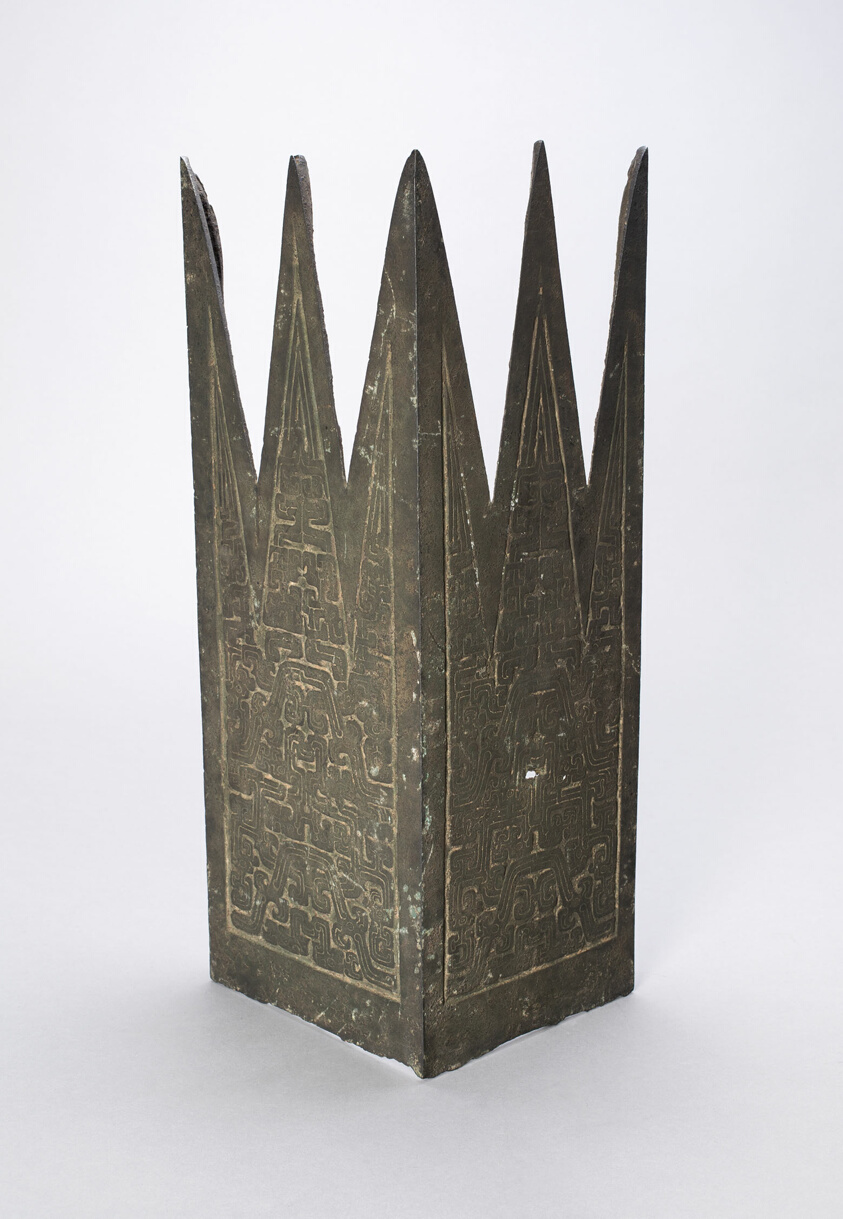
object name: Architectural fragment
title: Architectural Fitting (Gong)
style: Chinese (culture or style)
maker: China, Qishan county, Shaanxi province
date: Eastern Zhou dynasty, Spring and Autumn period (770–481 B.C.), 7th century B.C.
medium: Bronze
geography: China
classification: architectural fragment